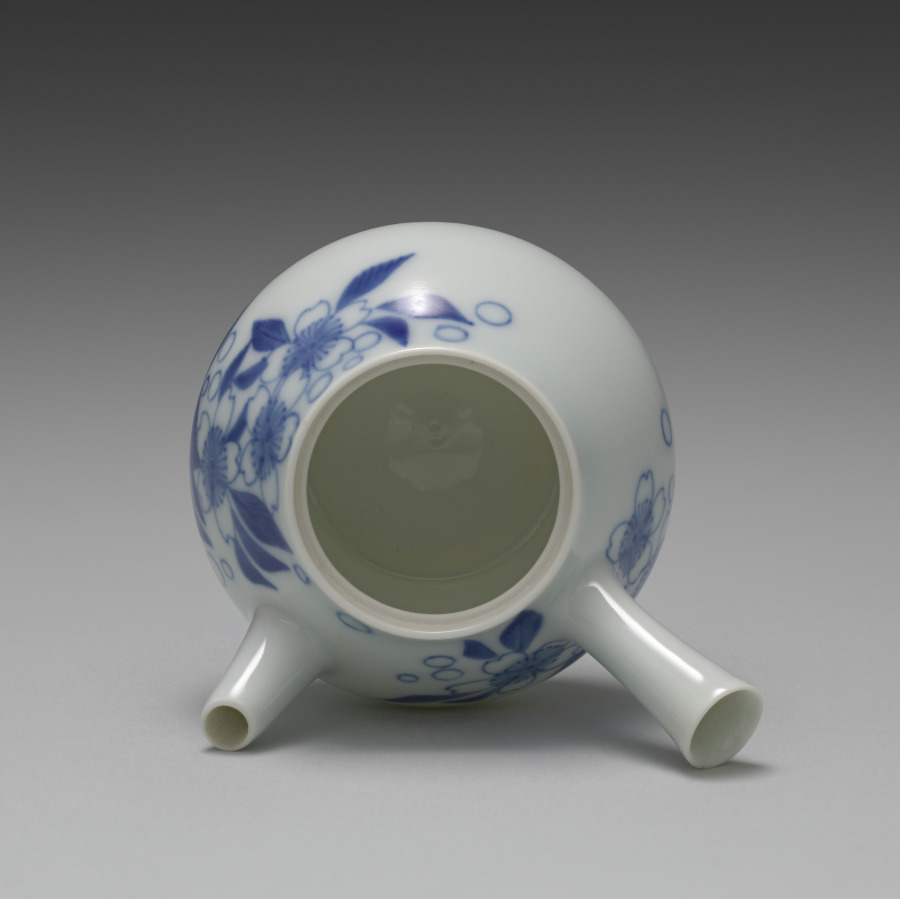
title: Teapot with Cherry Blossoms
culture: Japan, Taishō period (1912–26) or Shōwa period (1926–89)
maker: Seifū Yohei IV (Japanese, 1872–1951)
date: 1914–46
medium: Porcelain with underglaze blue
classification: Ceramic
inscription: 清風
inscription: 清風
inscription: 清風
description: This teapot with mountain cherry blossom motifs has its design in underglaze cobalt blue. It runs over both the pear-shaped body and the recessed lid, with its pointed, jewel-shaped handle. There is a faint bluish-green tint to the glaze. The mark impressed into the base of this work appears to be one used by Yohei III. However, the box inscription is brushed in a hand matching that of Yohei IV, and while the seal on the lid is one often used by Yohei III, that next to the signature on the back of the lid is one generally used by Yohei IV. The signature, too, resembles others belonging to Yohei IV. As the design, technique, and object named on the box accurately describe the contents, it seems unlikely, but not impossible, that it is mismatched. There are many cases in which Yohei III works are contained in boxes with inscriptions, seals, and a signature by Yohei IV. However, in such examples, Yohei IV clearly identifies himself as authenticating the work of his father and often includes his father’s Imperial Household Artist seal. This may be an example of a transitional piece in which Yohei IV has used his father’s mark on the base of his own work.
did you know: Cherry blossoms mark the arrival of spring, and their short-lived beauty is deeply anticipated and appreciated.